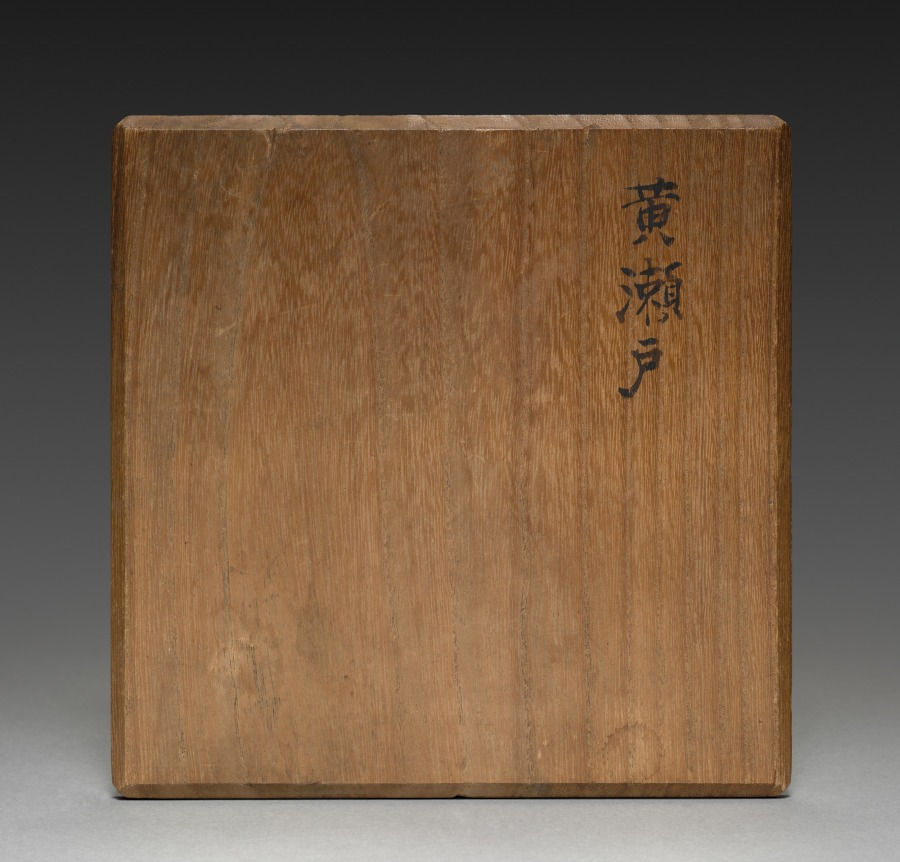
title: Bowl: Yellow Seto Ware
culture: Japan, Momoyama period (1573–1615)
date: c. 1590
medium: glazed stoneware with incised decoration (Seto ware)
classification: Ceramic